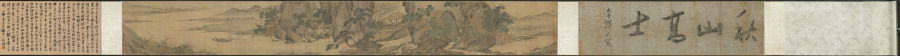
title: Scholar-Hermits in the Autumn Mountains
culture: China, Ming dynasty (1368–1644)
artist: Tang Yin (Chinese, 1470–1523)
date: 1500–1510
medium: handscroll, ink and light color on silk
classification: Painting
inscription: Artist's signature and 2 seals at end of scroll: Tang Yin [seals] T'ang Po-hu; T'ang Tzu'wei t'u-shu.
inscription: Title on frontispiece by Li Cho-kung (dates unknown).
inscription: 1 colophon and 11 additional seals: 1 colophon dated 1915 of Wu Tso-hsi (19th-20th c.); 2 seals of Gao Qifeng 高奇峰 (1889–1933); 5 seals of C. C. Wang 王季遷 (1907–2003); 4 seals unidentified.